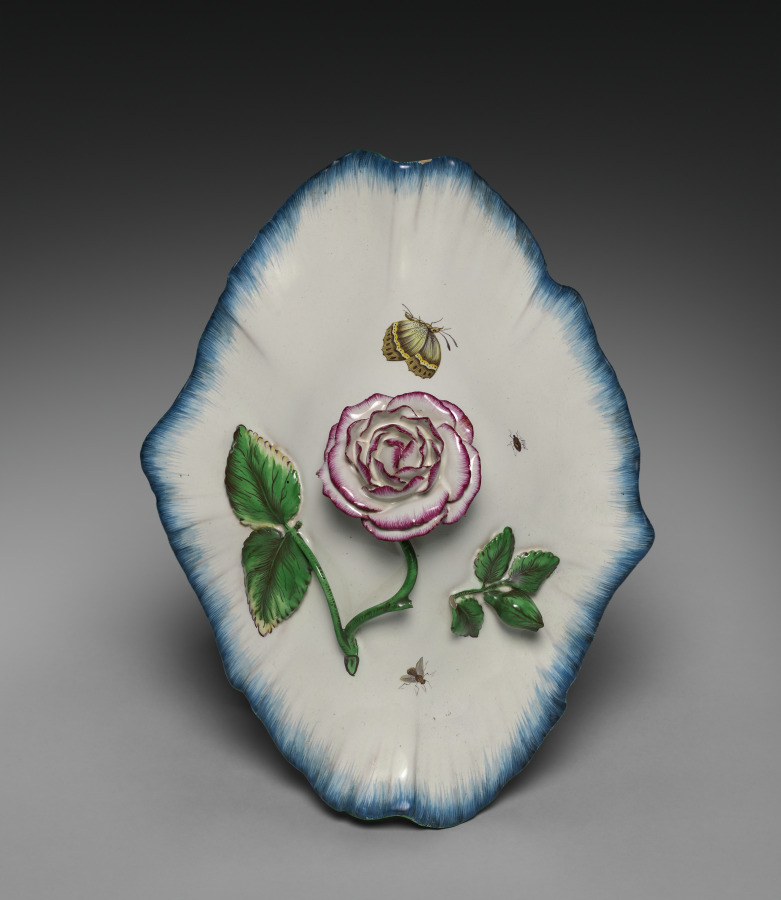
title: Cover for a Tureen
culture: France, Strasbourg, 18th century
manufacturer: Paul Hannong Factory (French)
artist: Strasbourg Factory (France)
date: c. 1750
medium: tin-glazed earthenware (faience) with enamel decoration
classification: Ceramic